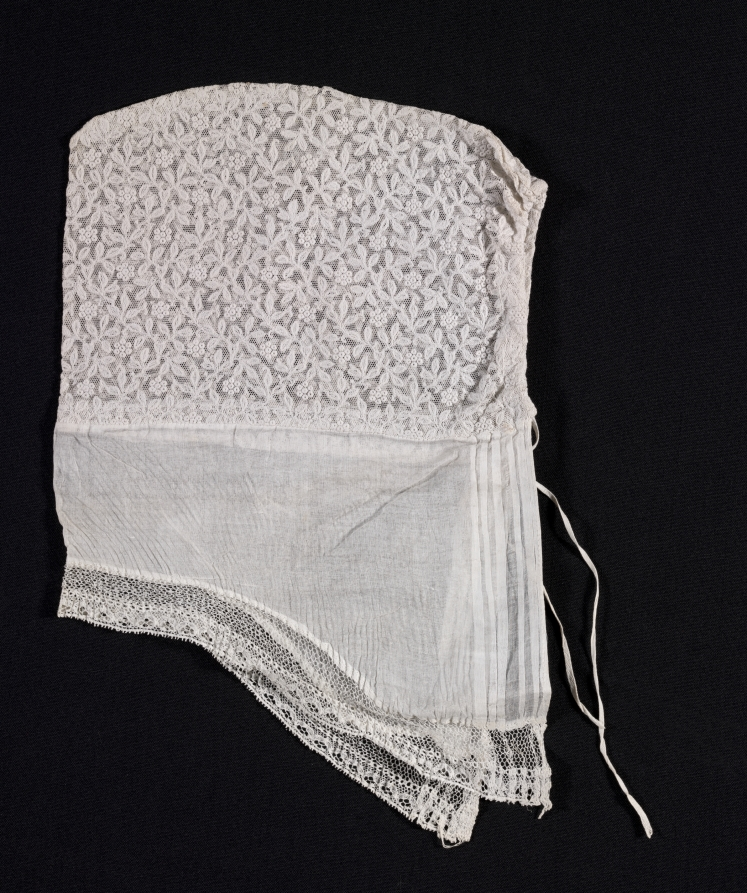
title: Cap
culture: Netherlands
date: 1900s-1940s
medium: Machine-made lace net, plain weave cotton, bobbin lace edging and embroidery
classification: Garment